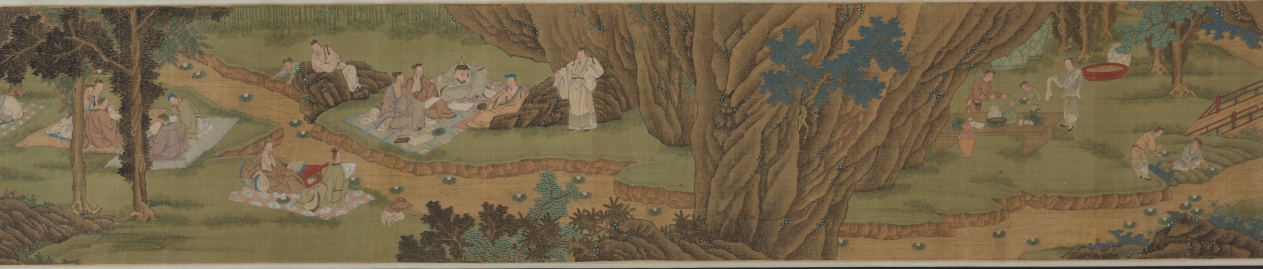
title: Purification at the Orchid Pavilion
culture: China, Qing dynasty (1644-1911)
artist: Fan Yi (Chinese, c. 1615–before 1688)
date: 1671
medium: Handscroll; ink and color on silk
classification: Painting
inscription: Artist's inscription, signature, and 2 seals: Painted by Fan Yi of Zhongfu during the second month of winter of the xinhai year [1671]. [2 seals] Fan Yi zhi yin, Zi yu yi.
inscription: Title on the frontispiece by Monk Yueshan (1629-1709).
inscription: 3 colophons and 13 additional seals: 1 colophon, dated 1707, and 6 seals of Yueshan; 2 colophons and 3 seals of Wong Kwan-Shut (Huang Junshi) 黃君實 (b. 1934); 2 seals of Fu Shen 傅 申 (b. 1937); 2 seals of Tessai Tomioka 富岡鐵齋 (1836-1924).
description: By the 1600s, the historic gathering at Lanting, Zhejiang province, in 353 CE was a common theme in Chinese painting. Originally based on a composition attributed to Li Gonglin (1049– 1106), now lost, Wu school artists revived the theme. Fan Yi, the brother of the artist Fan Qi from Nanjing, used delicate brushwork and luminous colors to depict the spring gathering.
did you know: The gathering’s host is in the Orchid Pavilion at the end of the scroll, representing an episode known as “Wang Xizhi Watching the Geese 王羲之觀鵝圖.”